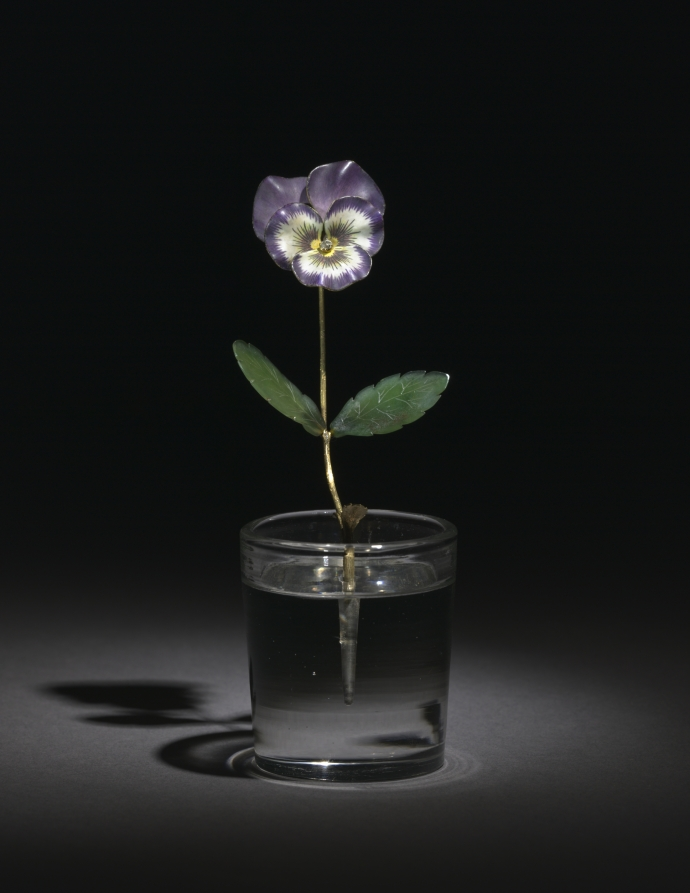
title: Pansy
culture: France, 20th century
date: before 1919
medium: gold, jade, diamonds, enamel, rock crystal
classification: Miscellaneous